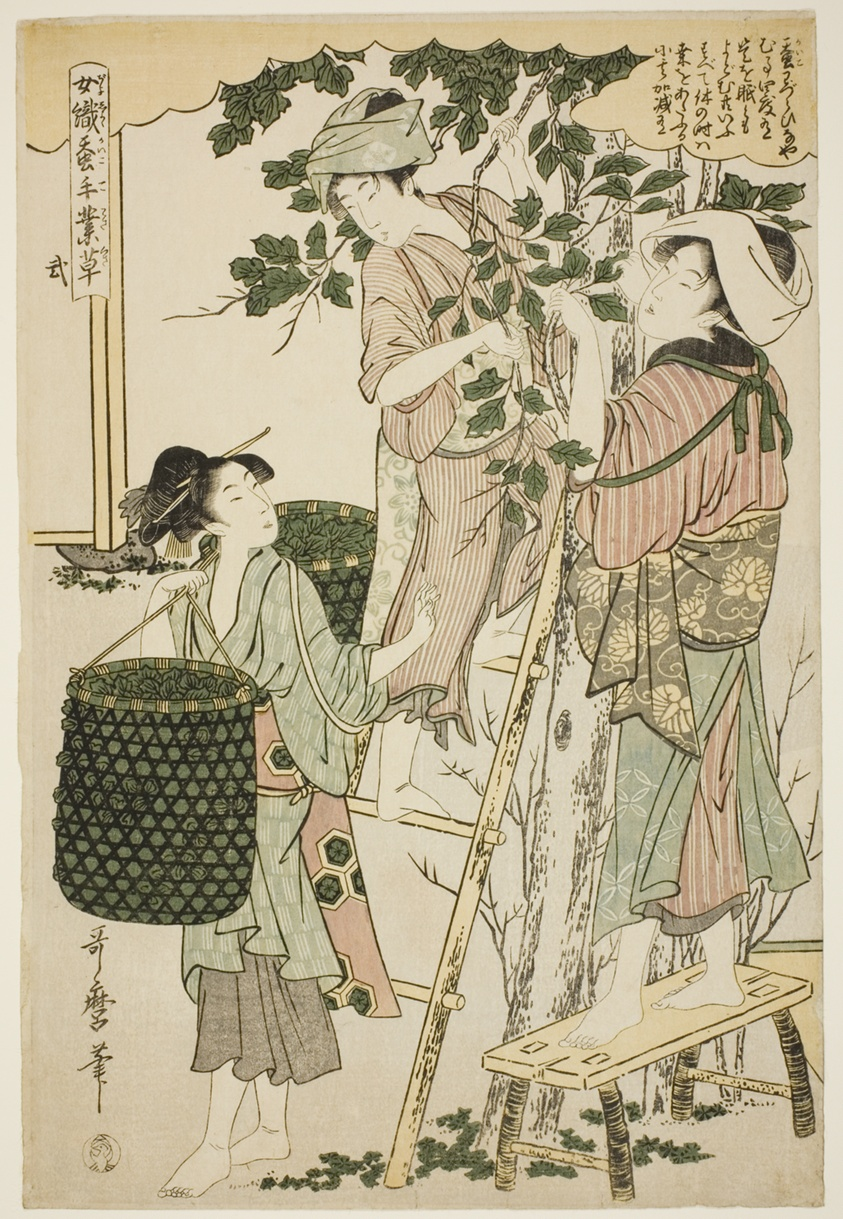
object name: Print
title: No. 2 (ni), from the series "Women Engaged in the Sericulture Industry (Joshoku kaiko tewaza-gusa)"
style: Japanese (culture or style)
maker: Kitagawa Utamaro 喜多川 歌麿; Japanese, 1753 (?)-1806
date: c. 1798/1800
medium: Color woodblock print; oban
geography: Japan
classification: woodblock print; print; asian art